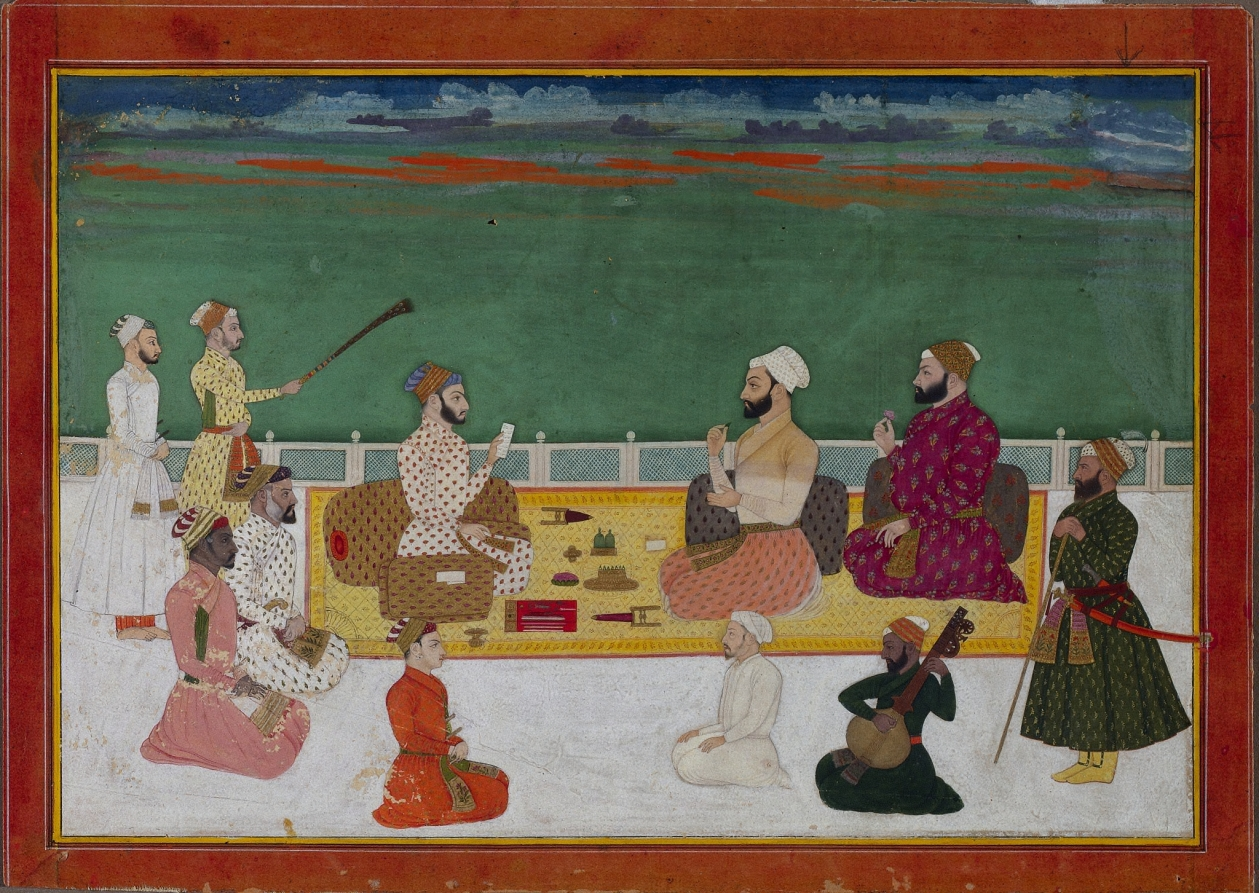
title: A Ruler Presents a Document to Visiting Nobles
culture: Mughal India, Deccan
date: c. 1700–1720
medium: Gum tempera and gold on paper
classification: Painting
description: Many carpets produced in the southwestern region of the Indian subcontinent feature a tone-on-tone mustard-yellow color scheme with lattice design. It demarcates the space of honor for the highest-ranking members of the refined gathering of literary connoisseurs. The figure facing right, with the peacock-feather whisk held over him, would be the host. He has a letter or poem in his hand. His guests have partaken of an aromatic betel-leaf packet (paan) and a rose from the dishes between them. Implements for writing and trimming paper lie on the carpet between a spittoon and courtly stabbing dagger (katar).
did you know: The figure in white has his mouth open, indicating that he is singing, accompanied by the musician behind him.